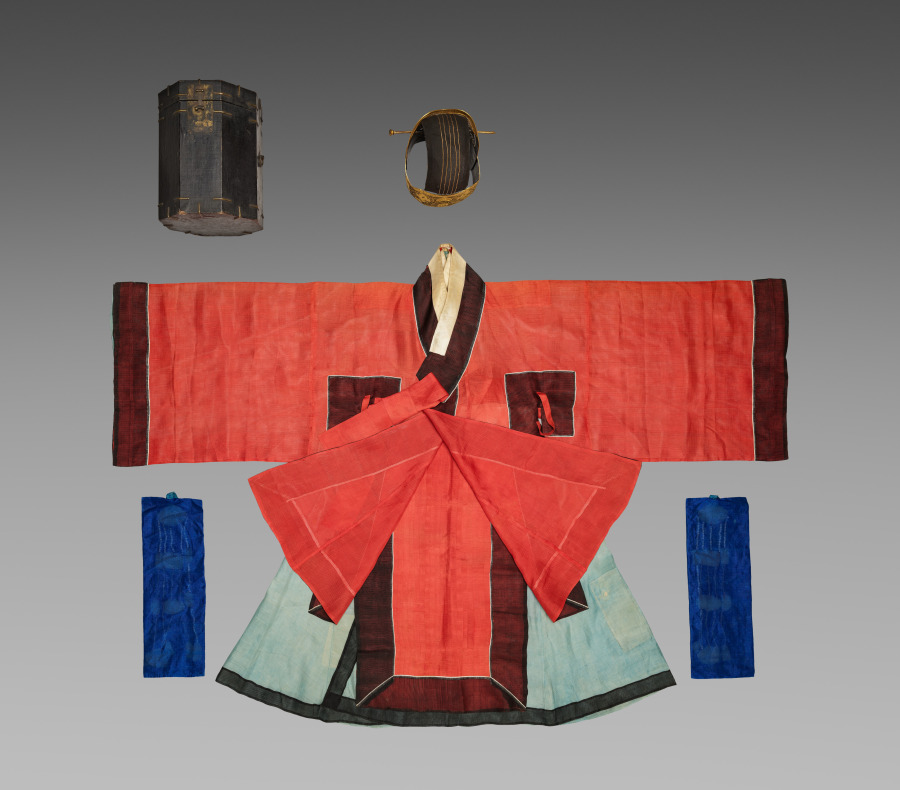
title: Royal Ceremonial Costume and Accessories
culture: Korea, Joseon dynasty (1392–1910)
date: late 1800s-early 1900s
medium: gilded paper, wire, black silk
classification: Garment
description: This is a set of royal ceremonial robe and accessories worn by a high-ranking court official for attending special state ceremonies. The set consists of an inner coat, an outer coat, a skirt, a back apron, a crown, a pair of jade tassels, a tablet, and a belt.